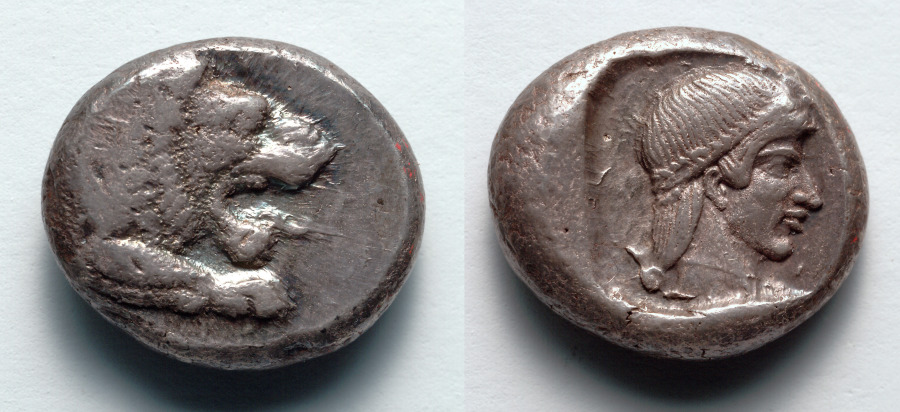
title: Drachm: Forepart of Lion (obverse); Head of Aphrodite (reverse)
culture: Greek, minted at Knidos (Karia)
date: 465–449 BCE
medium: silver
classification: Coins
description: The lion, king of the beasts and an animal associated with regal and heroic power, featured prominently on the coinage of many ancient Greek city-states. Artists placed the lion in a variety of poses, sometimes including the whole body, at other times the foreparts or just the head. Although it may once have roamed nearby, for many Greeks the lion was a monster nearly as exotic as the Chimaera, of which it formed a part, together with a goat head and snake-headed tail.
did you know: Although produced in the Classical period, this profile head of Aphrodite retains an Archaic look.